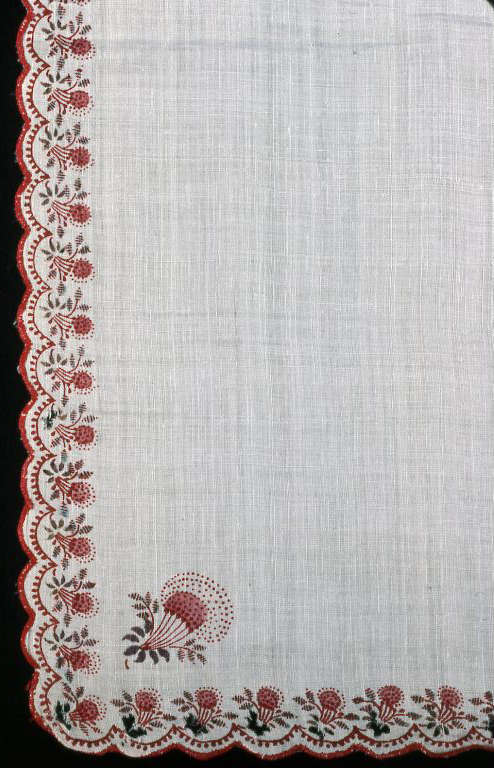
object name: Textile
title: Handkerchief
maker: France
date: 1825/75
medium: Linen, plain weave; printed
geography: France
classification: textile; weaving - printed; accessories (object genre)